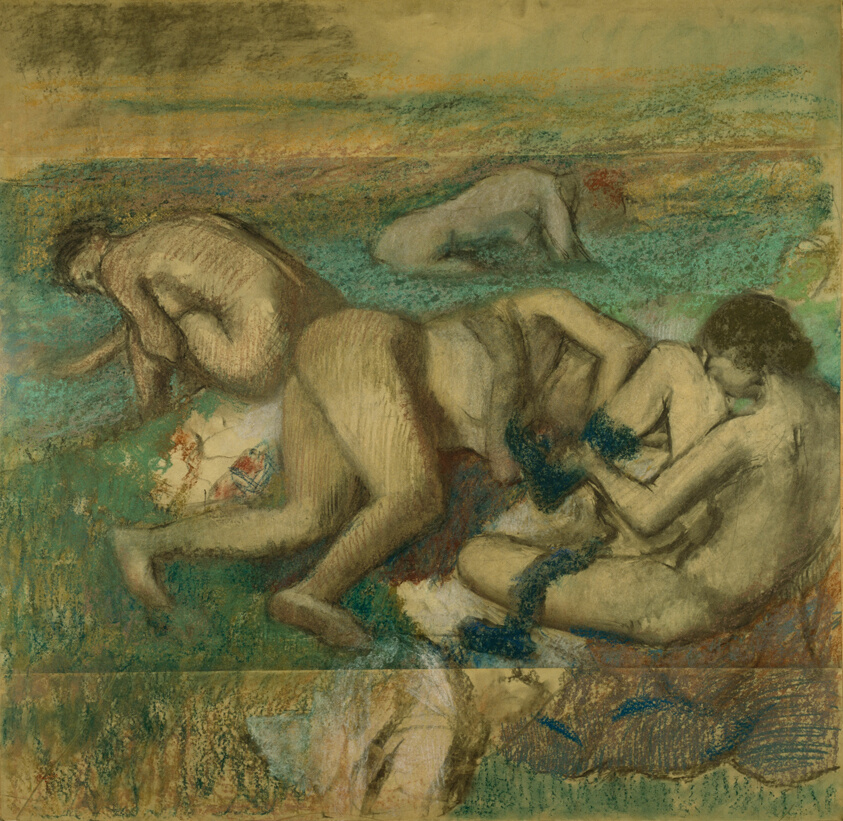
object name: Drawing and Watercolor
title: The Bathers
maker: Edgar Degas; French, 1834-1917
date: 1885/95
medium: Pastel and charcoal on tan wove paper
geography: France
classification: pastel; drawings (visual works); prints and drawing; paper